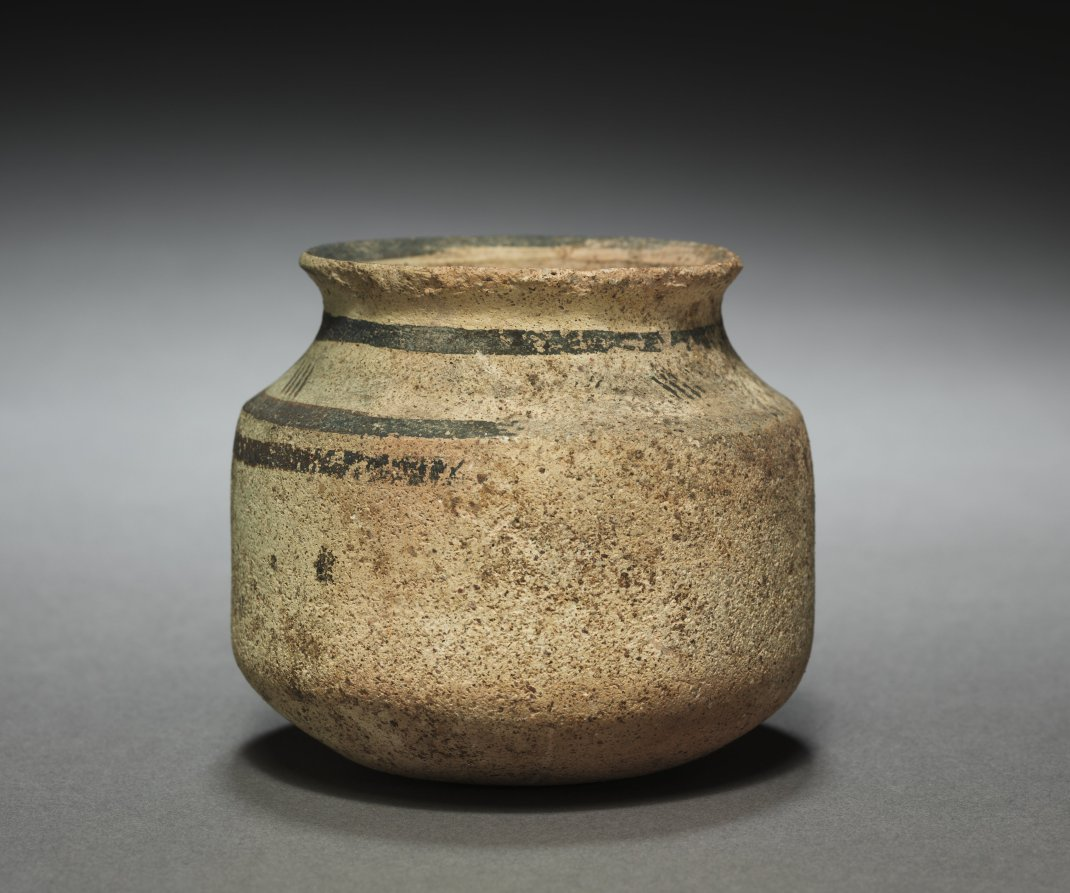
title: Pot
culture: Iran, Luristan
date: 3000–2000 BCE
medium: earthenware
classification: Ceramic